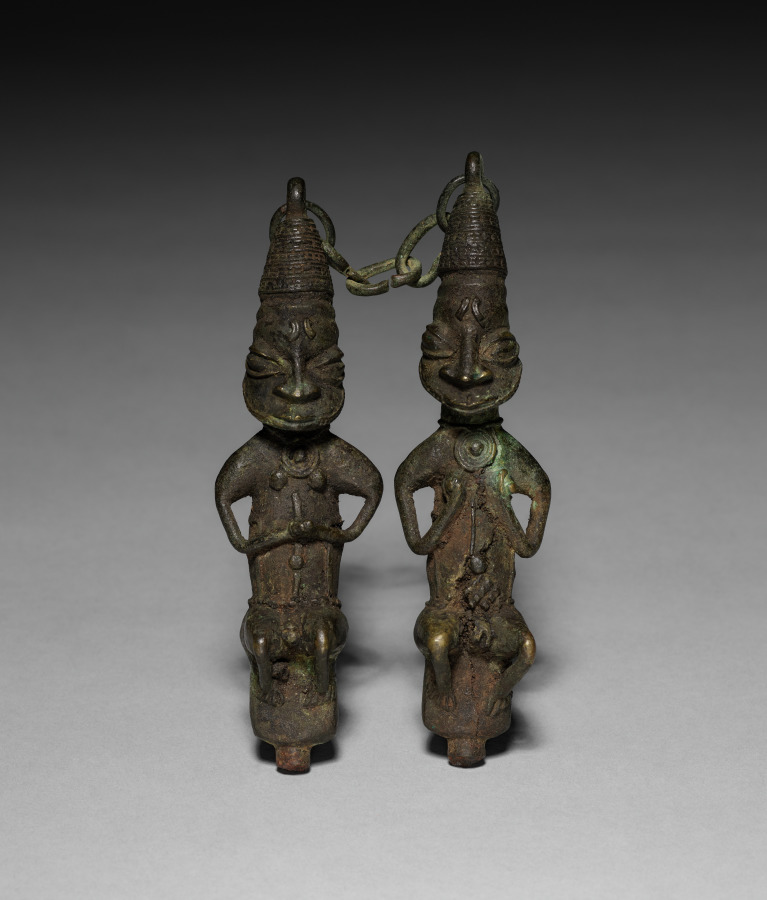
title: Pair of Ritual Staffs (ẹdan Ògbóni)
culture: Africa, West Africa, Nigeria, Yorùbá-style maker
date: possibly 1800s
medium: Copper alloy and iron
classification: Sculpture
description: The chain connecting these two figures allows them to be worn in public by a member of the Ògbóni or Òṣùgbó association as authority emblems. The male on the right gives the association’s typical salute by clasping his left fist on the right one, while the female on the left holds her breasts as a sign of welcome and generosity. The use of copper alloy and iron expresses Ògbóni/Òṣùgbó's concerns with longevity and durability.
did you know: Imagine how this would look when its owner wore it; the chain would go around the back of the neck and the figures would rest on their chest.